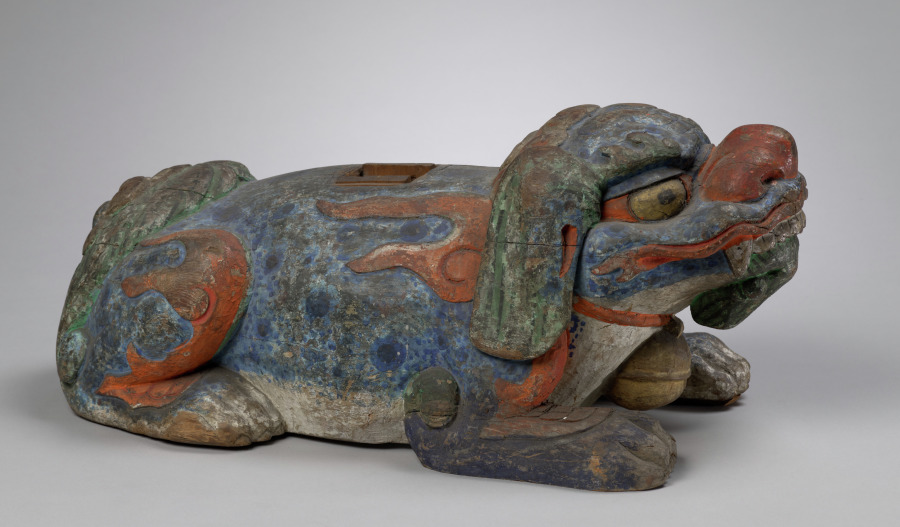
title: Base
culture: Korea, Joseon dynasty (1392–1910)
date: 1392–1897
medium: wood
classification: Arms and Armor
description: This wooden base for a musical instrument, possibly a set of bells or drums, was acquired in Korea in 1916 by Langdon Warner, who once served as the field agent for Asian art for the Cleveland Museum of Art. At the time of acquisition, it was mistaken as a part of a clothing stand related to a set of military uniform (1918.560.1) probably because the wooden base and a set of military uniform were purchased at the same antique shop.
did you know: It was a base of a musical instrument, such as a set of bells or drums.